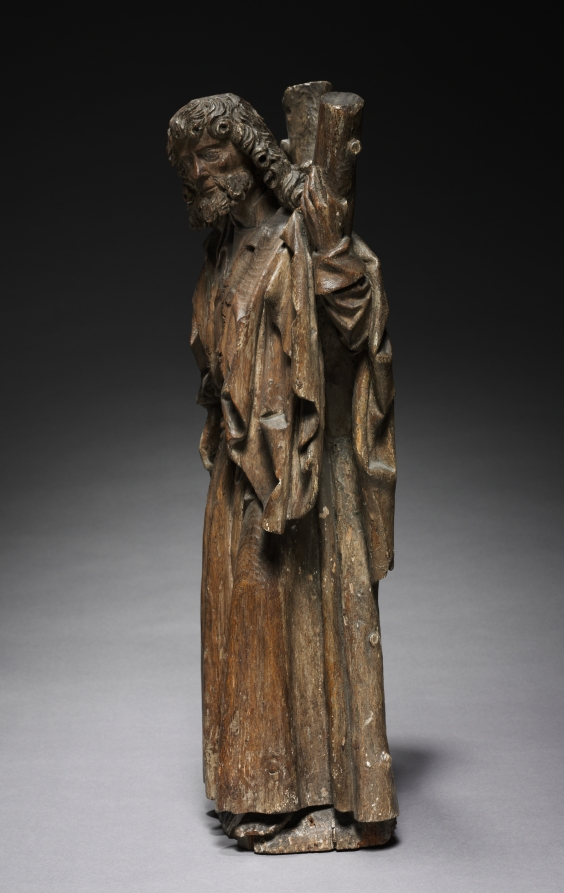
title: Saint Andrew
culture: Netherlands, Elsloo, 16th century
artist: circle of Master of Elsloo (Netherlandish)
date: c. 1515–20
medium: oak with traces of paint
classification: Sculpture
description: Apostle figures such as this were made in large numbers in the eastern Netherlands during the early 1500s. This figure of Saint Andrew, identified by his X-shaped cross, was undoubtedly a single figure from an apostle series. It may have been used above a choir stall in a church, or else part of an apostelbalk, a wooden beam with a figure of Christ at the center. These beams were mounted high above the interior of the church to separate the nave (used by lay people) from the sanctuary, accessible only to the clergy. The artist is named after a multicolored group of Saint Anne with the Virgin and Child, now in the Augustinuskerk in Elsloo, the Netherlands. The sculptor is probably Jan van Oel, who was working in and around Roermond in about 1500–1520. Most of the sculptures attributed to this master are in churches in Belgium and Dutch Limburg and in the neighboring German region.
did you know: Traces of paint found on this sculpture suggest that at one point it was painted.